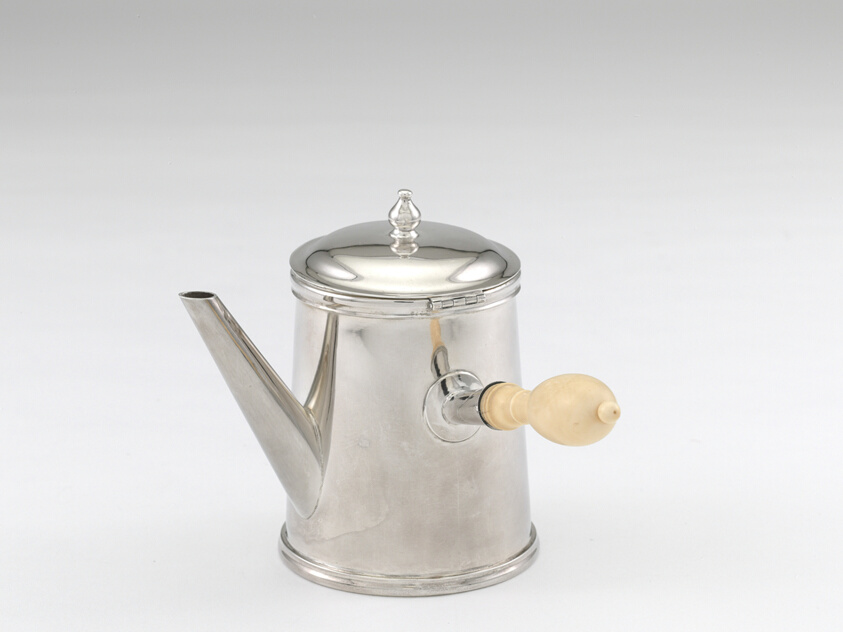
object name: Metalwork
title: Chocolate Pot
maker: Jones, Ball & Poor; American, 1846–1853; Boston Massachusetts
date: c. 1846–53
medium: Silver and ivory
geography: Boston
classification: chocolate pot; silver; vessel for serving drinks; american decorative arts; american arts; decorative arts